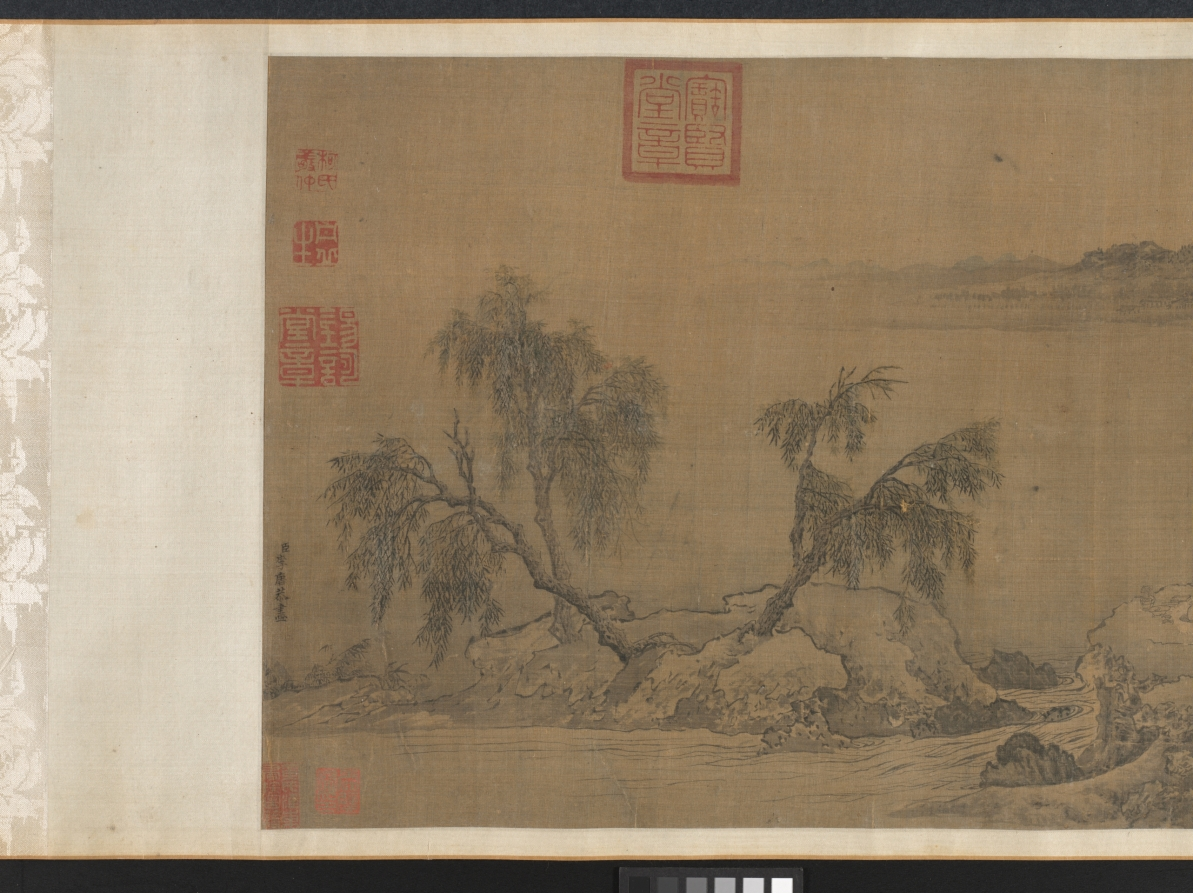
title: Tao Yuanming's Return Home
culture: China, Yuan dynasty (1271-1368)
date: 1300s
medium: Handscroll; ink and slight color on silk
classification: Painting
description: Tao Yuanming's revered poem "Return Home 歸去來辭 (Gui qu lai ci)" powerfully conveys his desire to leave bureaucratic life for the simplicity and authenticity of nature. This sentiment has deeply resonated with generations of Chinese scholars, making it a popular theme in paintings. This handscroll uses continuous narrative depicting Tao in multiple scenes from the poem. Starting on the right, the poet travels to his home. His children wait by the gate, while his wife pauses to tidy her hair before welcoming him. Then, free from the burdens of official service, Tao spends time in both nature and his cottage, where he can again enjoy wine, music, and books.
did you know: Poet Tao Yuanming 陶淵明 (c. 365–427 CE) returned to a secluded life instead of pursuing a civil service career.